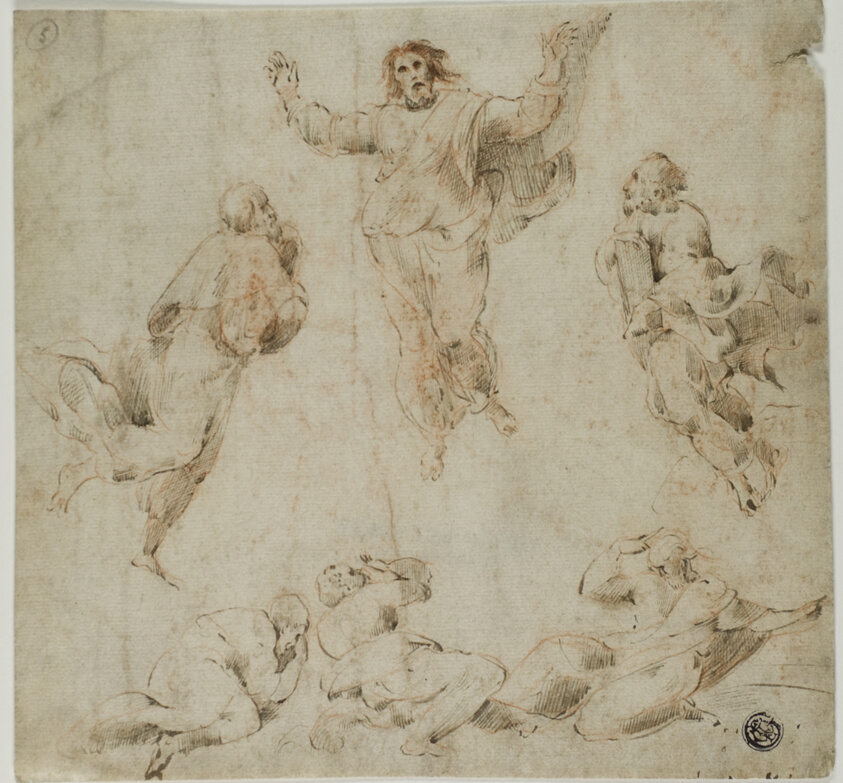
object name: Drawing and Watercolor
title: Transfiguration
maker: After Raffaello Sanzio, called Raphael; Italian, 1483-1520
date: c. 1530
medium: Pen and brown ink, with red chalk, on ivory laid paper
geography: Italy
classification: pen and ink drawings; drawings (visual works); prints and drawing